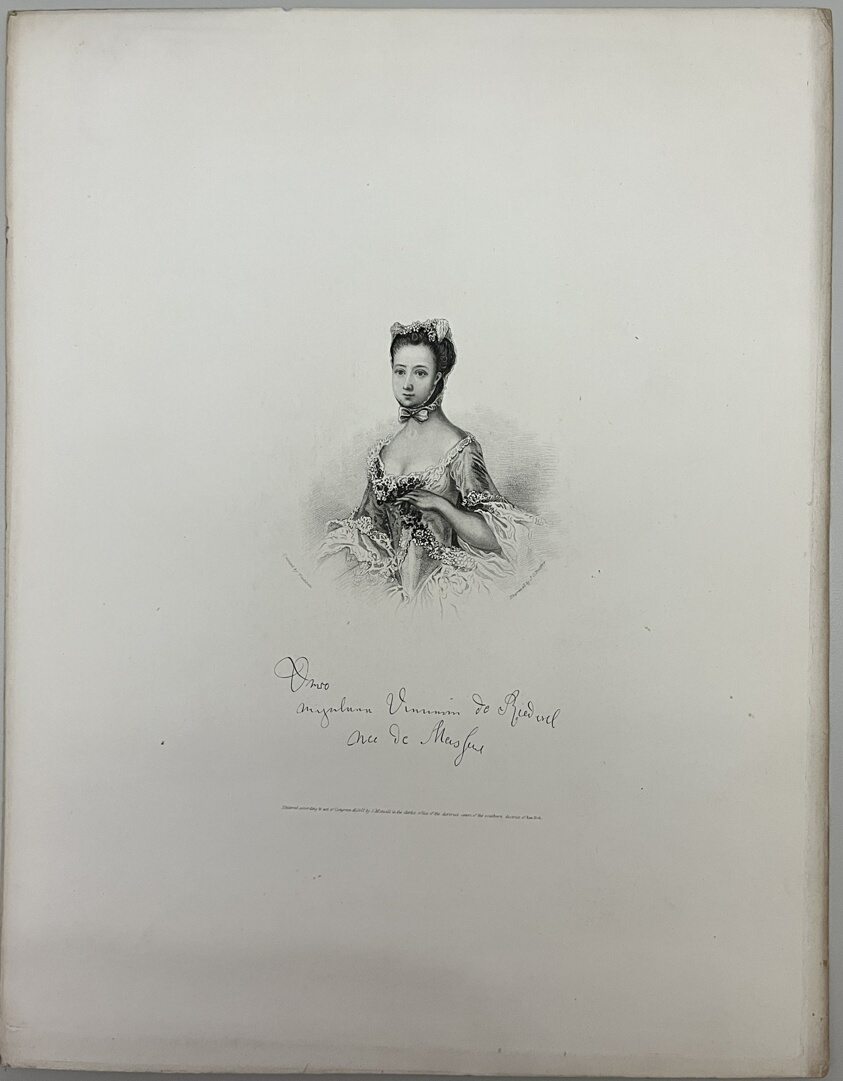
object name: Print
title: Frederika Charlotte Louise von Massow, Baroness (Freifrau) Riedesel zu Eisenbach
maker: John Chester Buttre (American, 1821-1893); after Johann Friedrich August Tischbein (German, 1750-1812)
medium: Stipple engraving on paper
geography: United States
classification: reproduction; print; prints and drawing